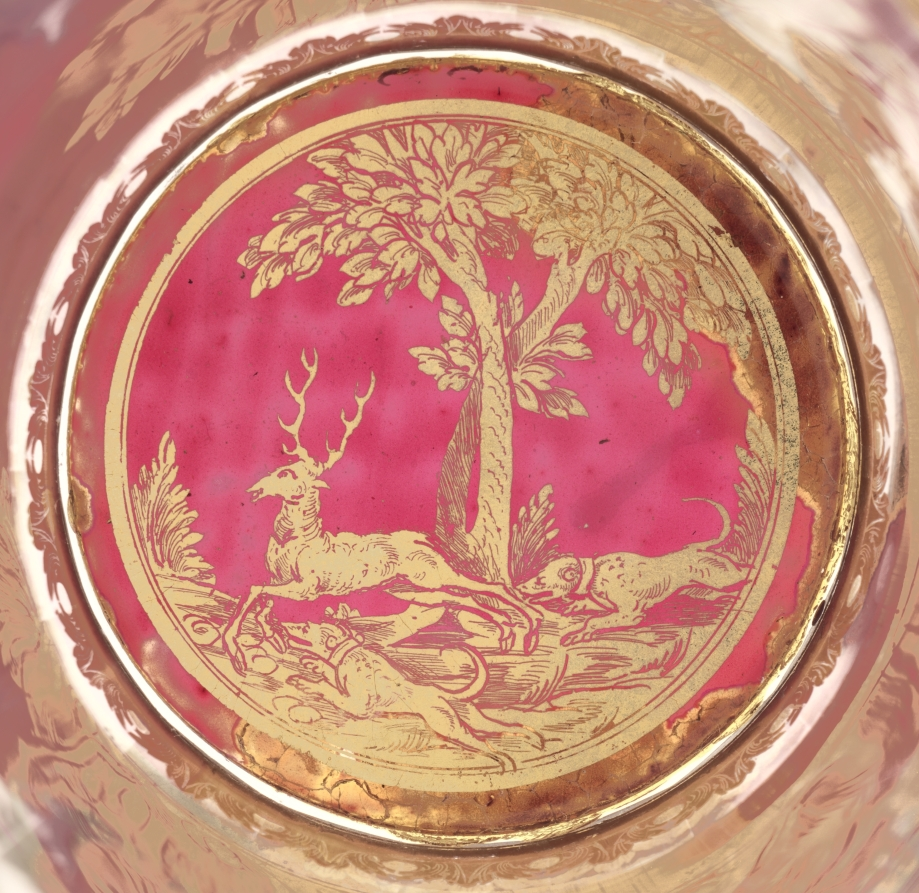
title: Tumbler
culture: Bohemia, 18th century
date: c. 1730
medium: zwischengoldglas (glass)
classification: Glass